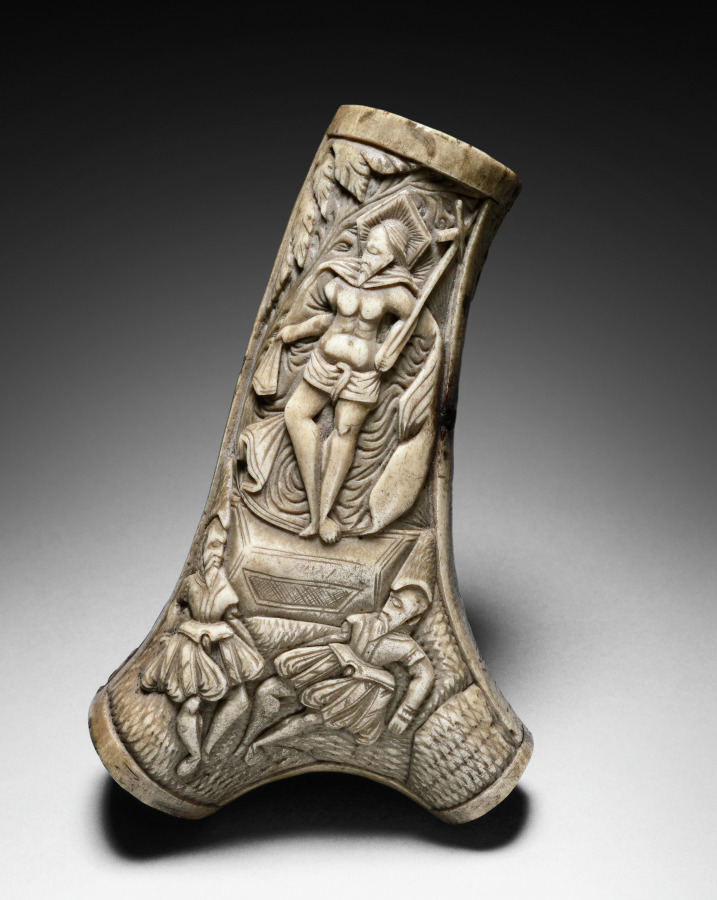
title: Powder Flask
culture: Germany, late 16th Century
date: c. 1580–1600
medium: staghorn with carved relief decoration; mounts missing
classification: Arms and Armor